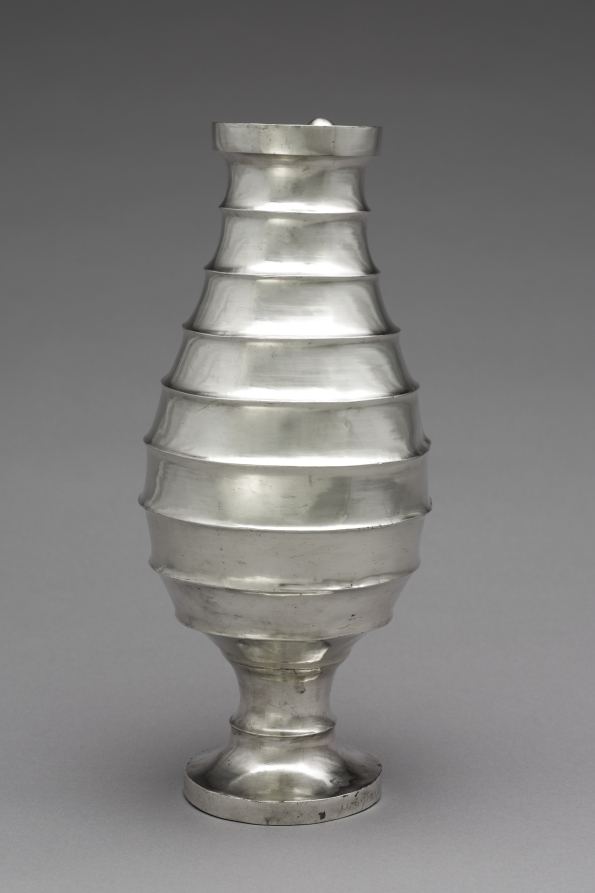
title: Stepped Pitcher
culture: Iran, Sasanian Empire (224–651 CE)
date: 400–600 CE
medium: silver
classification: Metalwork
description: The Sasanians are best known today for their expert work in silver. This museum is fortunate to have one of the most important collections of Sasanian silver vessels in the world.